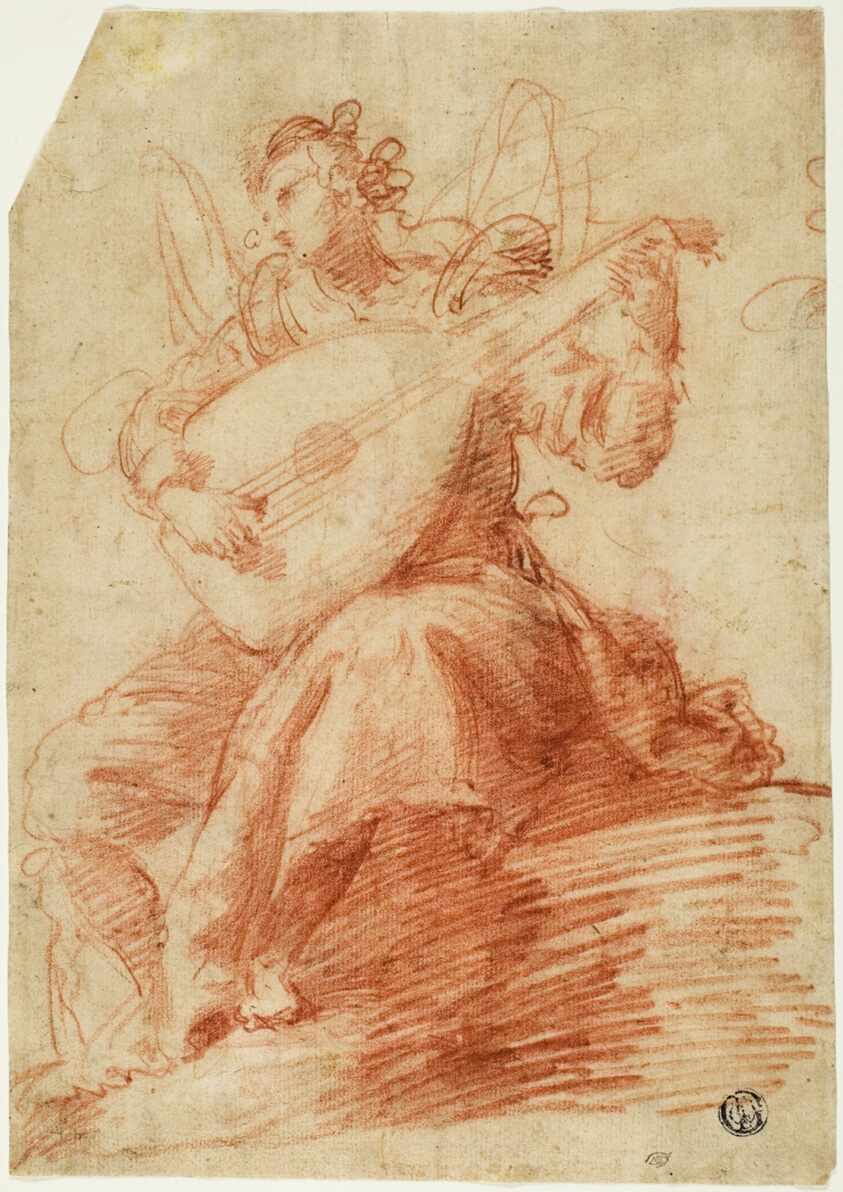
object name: Drawing and Watercolor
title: Angel Playing a Lute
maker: Attributed to Jacopo Confortini (Italian, 1602-1672); or possibly Giovanni (Antonio) Bilivert (Italian, 1585-1644); or possibly Giovanni Mannozzi (Italian, 1592-1636)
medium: Red chalk, on buff laid paper, laid down on ivory wove paper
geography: Italy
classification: chalk; drawings (visual works); prints and drawing